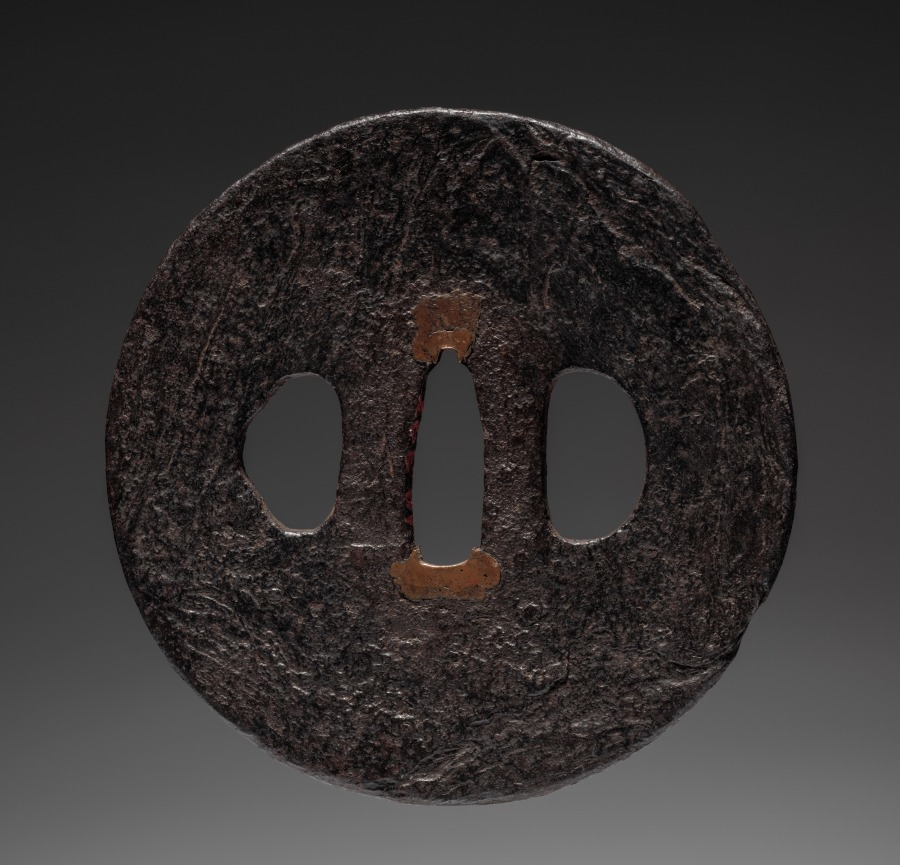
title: Sword Guard (Tsuba)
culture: Japan, possibly Edo period (1615-1868)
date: c. 1615–1868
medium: iron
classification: Arms and Armor